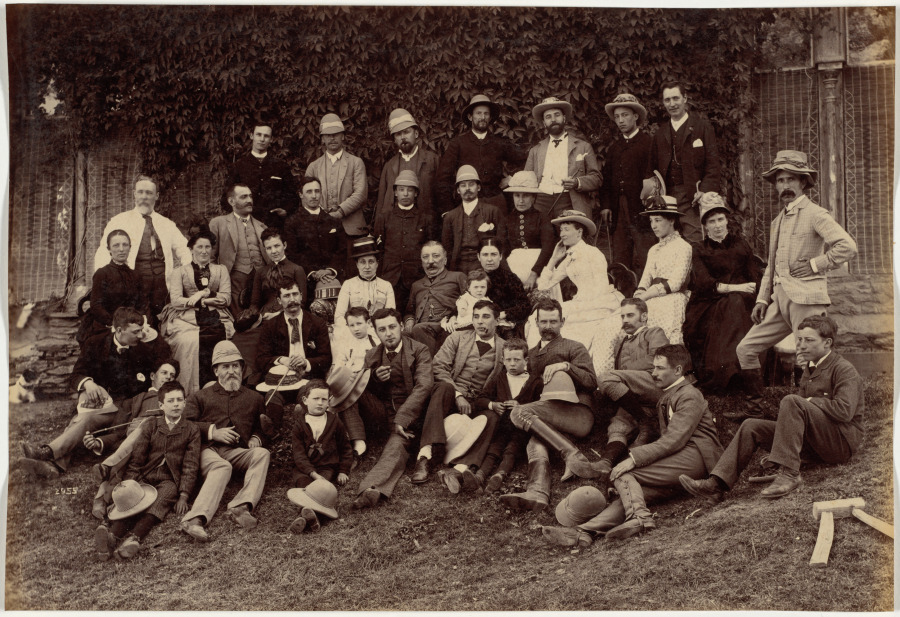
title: Picnic Party at Mr. Peliti's Country House, Mashobra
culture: India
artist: Raja Deen Dayal (Indian, 1844–1905)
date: 1887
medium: albumen print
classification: Photograph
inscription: Stamped in black ink on verso: “2.H.7”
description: This scene is from one of many lavish entertainments hosted by local caterer, restaurateur, and hotelier Federico Peliti (Italian, 1844–1914) at his forested country estate outside Shimla. In the photograph, Peliti is on horseback and his wife Judith is on the swing. Swings have a long history as items of leisurely pleasure in Europe and India. Badminton, which originated in England in 1873, was popular in India. Deen Dayal may have been invited to document this gathering because he and Peliti, an amateur photographer, both belonged to the Photographic Society of Bombay.